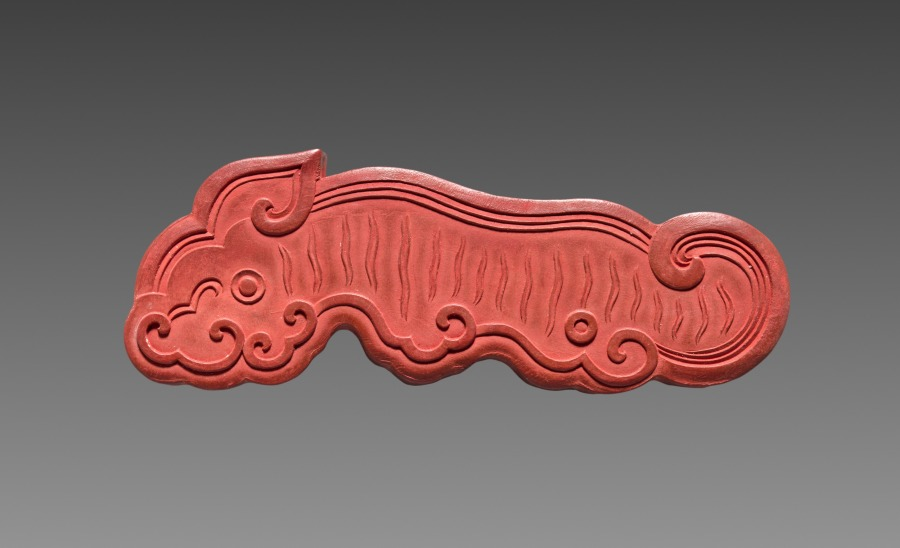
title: Box with Ink Cakes: Red Ink Cake in Shape of a Kui Dragon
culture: China, Qing dynasty (1644-1911), Jiaqing reign (1795-1820)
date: 1795–1820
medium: Molded ink in red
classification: Miscellaneous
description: Ink cakes (also called ink sticks) are dissolved with the addition of water and then ground on the surface of a flat square stone into liquid ink for painting and calligraphy. The precious ink cakes here, however, have never been used. The inscription on the side of the blue ink cake says that the set was commissioned by Chen Huai, Governor of Jiangxi Province.